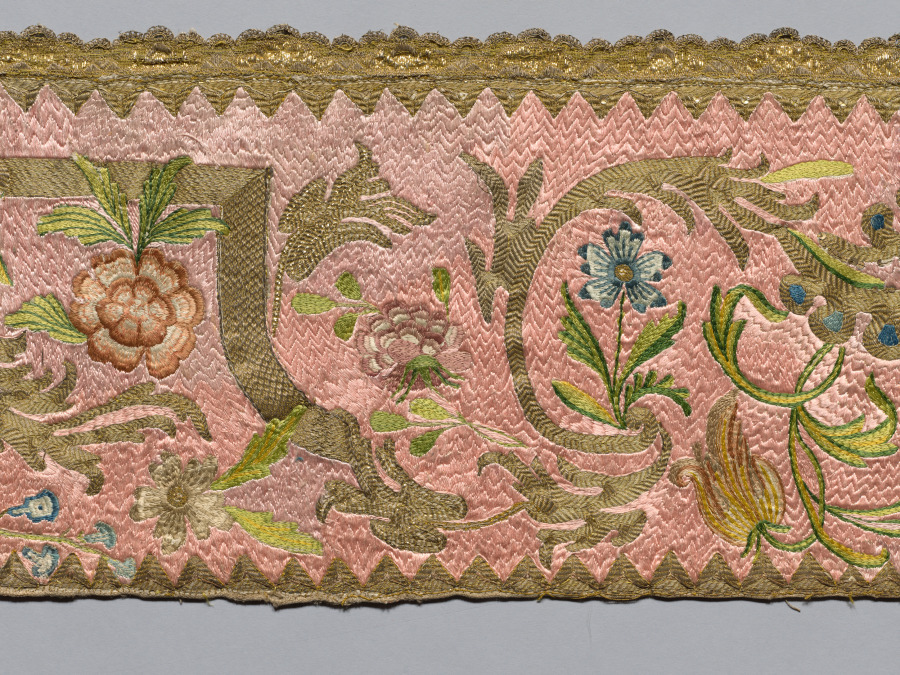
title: Embroidered Strip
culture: Italy, 18th century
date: 1700s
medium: embroidery, silk and gold thread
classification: Embroidery